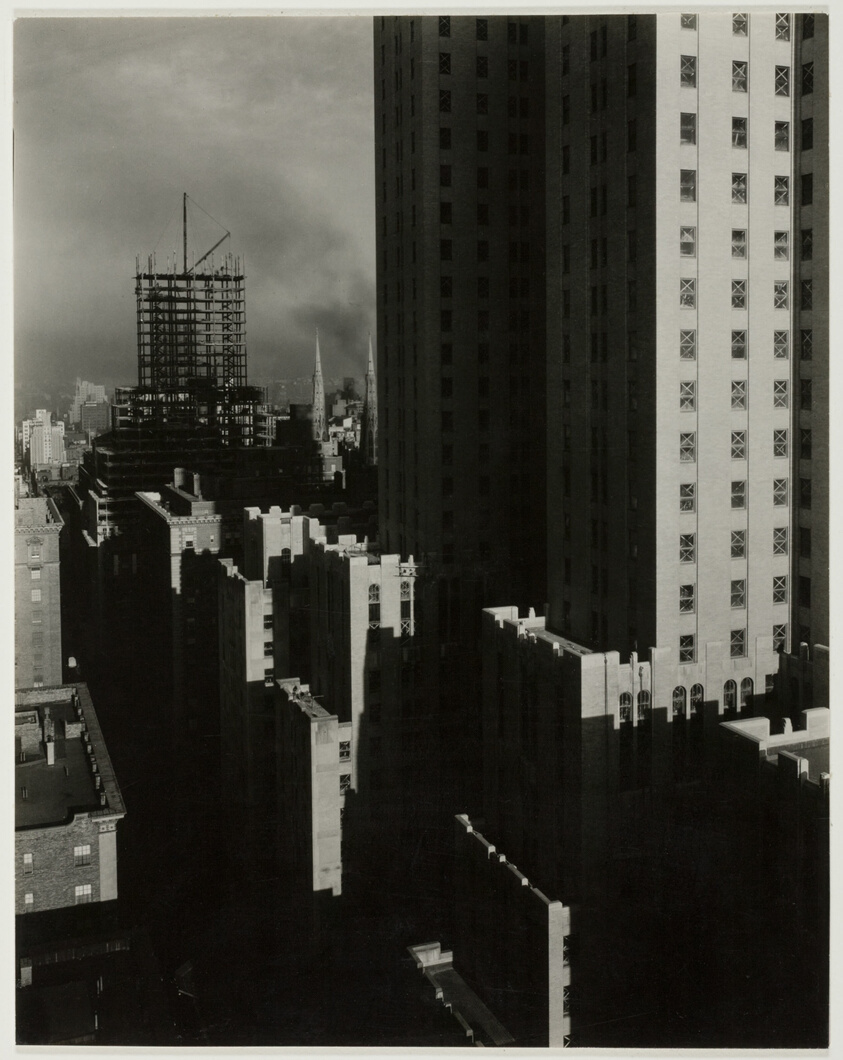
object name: Photograph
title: From My Window at the Shelton, West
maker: Alfred Stieglitz (American, 1864–1946)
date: 1931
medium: Gelatin silver print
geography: United States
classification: gelatin silver (developing-out-paper) pr; photographic process; photography; photograph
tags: cityscapes